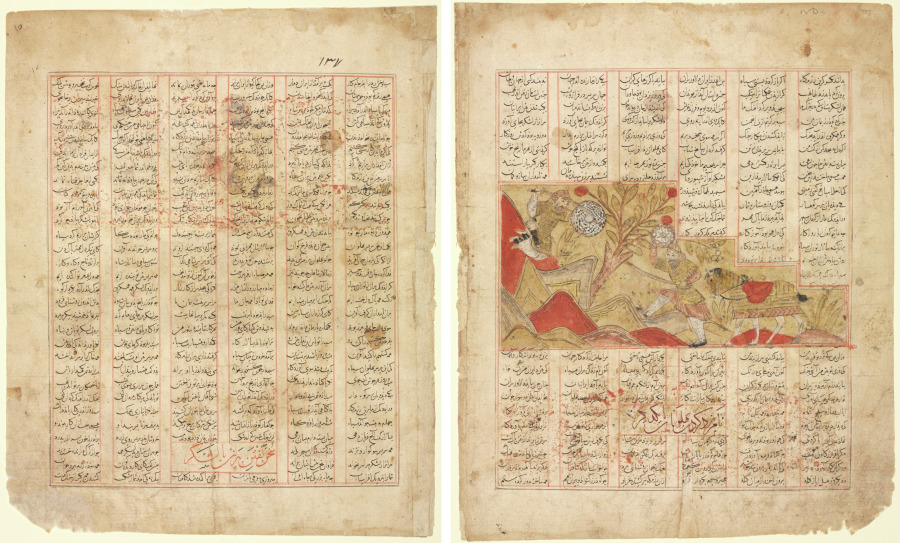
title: The Tale of the Twelve Faces. "Bizhan Addresses the Army": Illustration from the Firdausi Shahnama (recto); The Tale of the Twelve Faces. "The Warriors Engage in Combat": Illustration from the Firdausi Shahnama (verso)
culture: Iran, Shiraz, Inju (Il-Khanid), 14th Century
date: 1341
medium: opaque watercolor and ink on paper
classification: Manuscript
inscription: Script: Naskh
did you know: The combat scene is enclosed within a step-shaped frame.